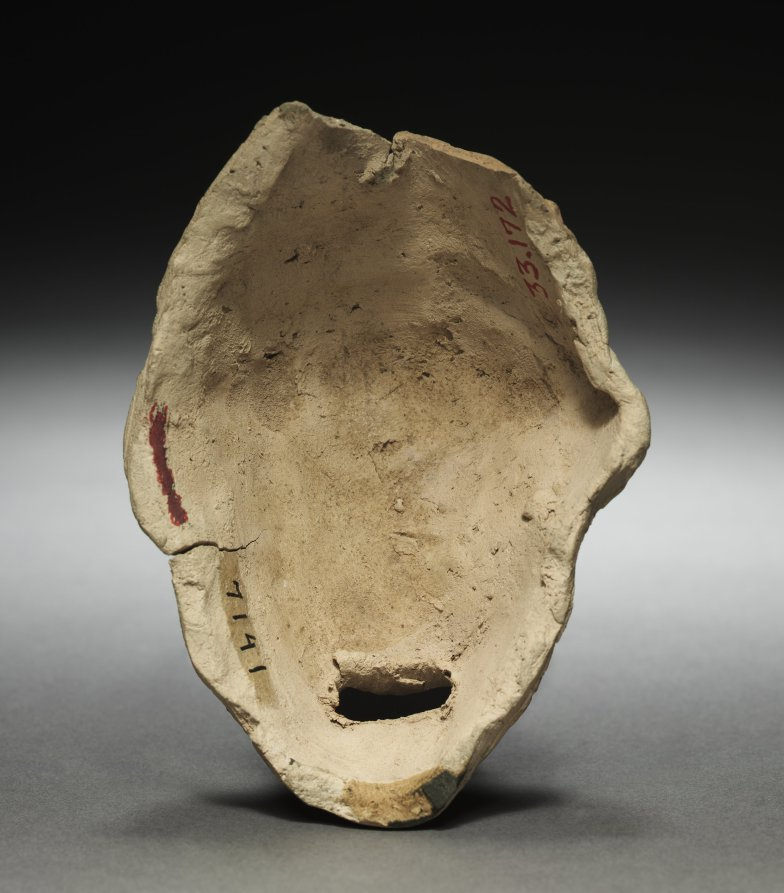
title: Head of a Weeping Woman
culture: Parthian Empire (247 BCE–224 CE)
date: 1–200 CE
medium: terracotta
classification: Sculpture